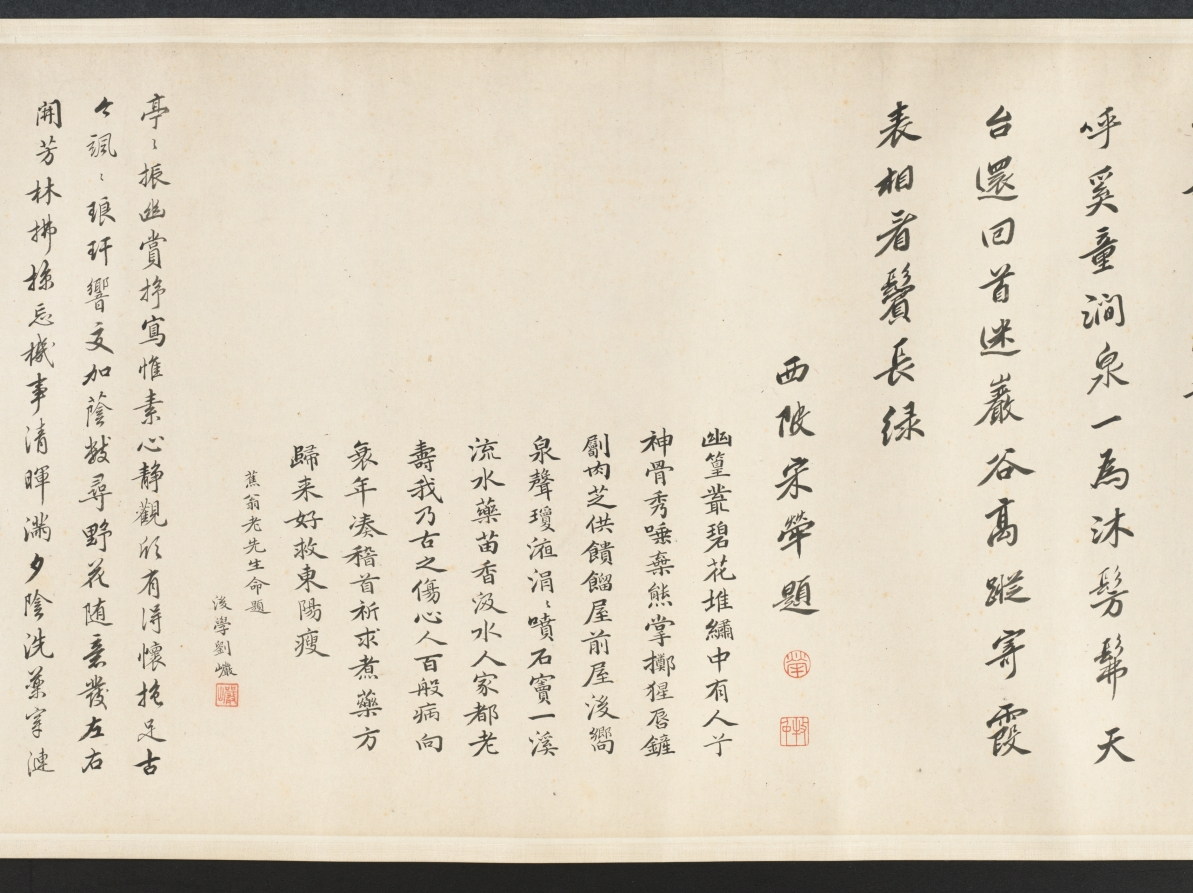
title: Cleansing Medicinal Herbs in the Stream on a Spring Day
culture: China, Qing dynasty (1644-1911)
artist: Yu Zhiding (Chinese, 1647–c. 1716)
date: 1703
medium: Handscroll; ink and color on silk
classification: Painting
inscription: Title by Chen Yixi.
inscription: 姑射仙人冰雪膚，新詩傳唱滿通都。/ 極知遲暮難為別，更展春泉洗藥圖。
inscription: Colophon by Chen Tingjing 陳廷敬 (1639–1712). Colophon by Wang Hongxu 王鴻緒 (1645–1723), dated 1707. Colophon by Song Luo 宋犖 (1634–1714). Colophon by Liu Yan 劉巗. Colophon by Jing Xikui 涇西夔. Colophon by Liu Yan 劉巗. Colophon by Cao Yin 曹寅. Colophon by Wang Shihong 汪士鋐. Colophon by Wang Shidan 王式丹 (1645–1718), dated 1712. Colophon by Shi Shenyi 史申義 (1661–1712), dated 1712. Colophon by Yin Yuqing 殷餘慶, dated 1712.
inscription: Colophon by Chen Shixia 陳時夏, dated 1729.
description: A famous portraitist, Yu Zhiding here depicts the likeness of Shi Shenyi 史申義 (1661–1712), an official and poet. Master Shi, a sickly man, was deeply interested in medicinal science. The opening section of the scroll features a boy washing a fungus in fresh spring water, a basket of medicinal herbs by his side. Other servants carry a fan, a bundle of scrolls, and a cup of tea or hot wine. Master Shi sits in a bamboo grove, surrounded by fields of herbs. Returning swallows, pink peach blossoms, and blooming magnolia indicate spring, whereas the fungus conveys wishes for long life. The spring theme may express the artist’s wish for his friend’s recovery.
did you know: In the pavilion are some of Shi Shenyi’s scholarly accoutrements: a stack of books, an antique zun 尊 (wine vessel), a brush holder, an ink stone, and a small chime.